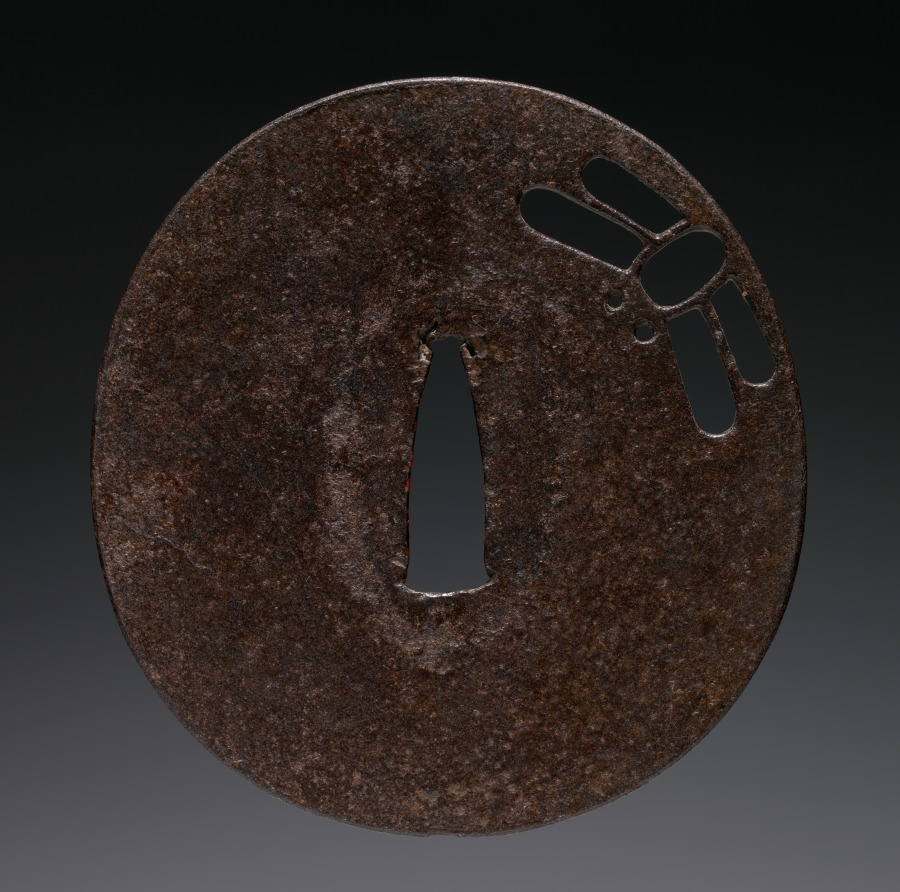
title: Sword Guard (Tsuba) with Dragonfly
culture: Japan, possibly Edo period (1615-1868)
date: c. 1615–1868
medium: iron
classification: Arms and Armor